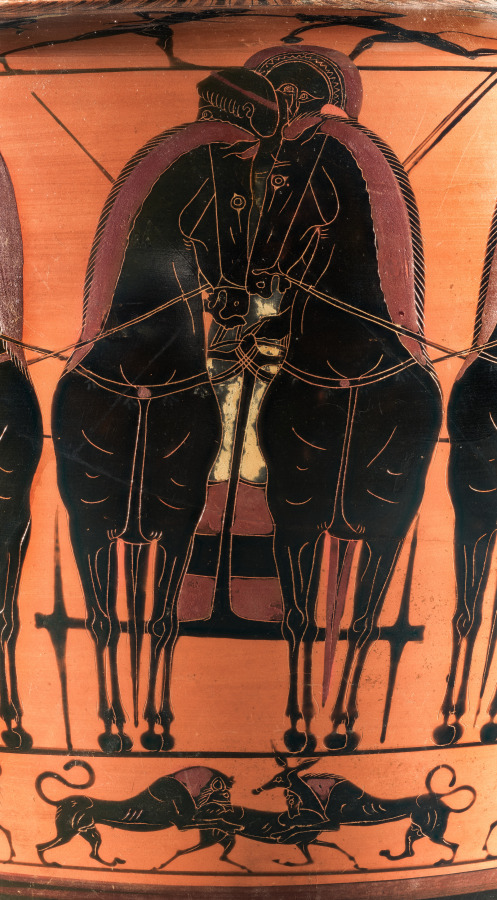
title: Black-Figure Hydria (Water Vessel): Frontal Quadriga (Body); Theseus and Minotaur (Shoulder)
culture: Greece, Attic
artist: attributed to Antimenes Painter (Greek, Attic, active c. 530–510 BCE)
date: c. 520 BCE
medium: ceramic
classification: Ceramic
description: Although their subjects differ, the three fields of figured decoration on this vessel relate to one another metaphorically through the theme of victory. Just as Theseus defeats the Minotaur on the shoulder, two lions converge on a deer in the predella (the small, lowermost panel). In the largest panel, victory is still to come, presumably for all three warriors shown: one in the chariot behind his driver, and one on foot on either side. Somewhat unusually, two of the warriors look directly out at the viewer, their frontal faces an interesting complement to the much more common frontal chariot.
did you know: This type of water vessel, a hydria, takes its name from hudor, Greek for water (and still familiar in the English root hydro).